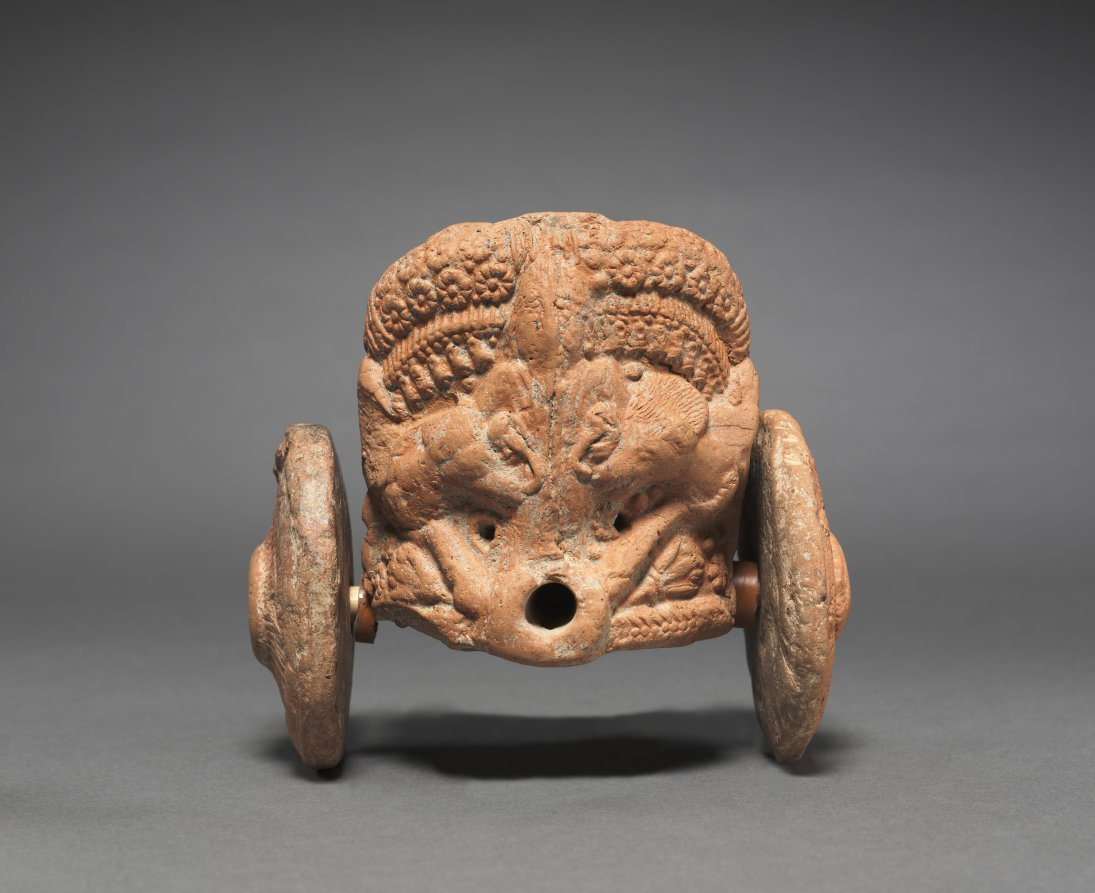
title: Model Chariot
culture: India, Shunga period (185–78 BCE)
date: 200s–100s BCE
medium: terracotta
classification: Sculpture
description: This terracotta chariot may have held a figurine of a hero or divinity for use on a domestic altar or as a toy. The two-wheeled conveyance is decorated with rows of flowers and bells. A charioteer and two horses, now indistinct, appear to have been carved onto the front.